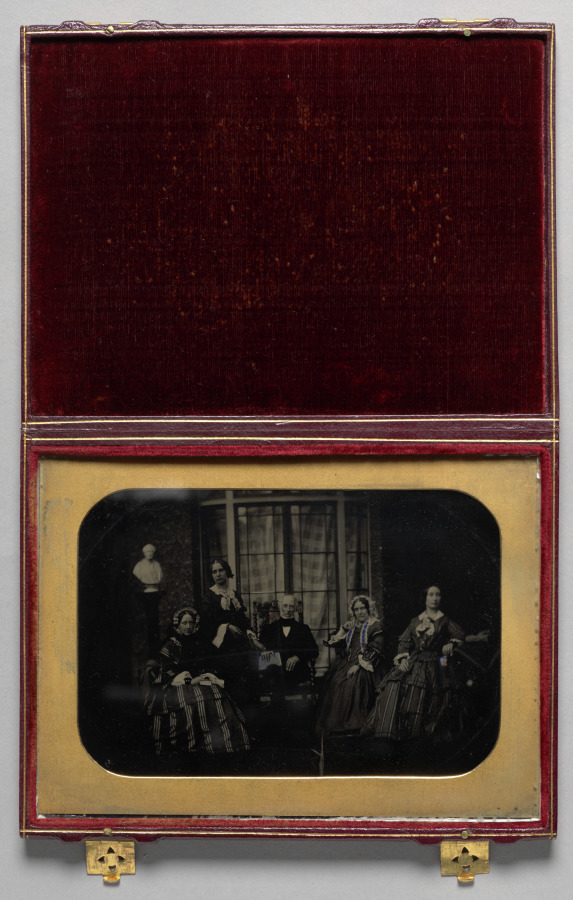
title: English family of five with marble bust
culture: England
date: 1850–65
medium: ambrotype, half plate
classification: Photograph